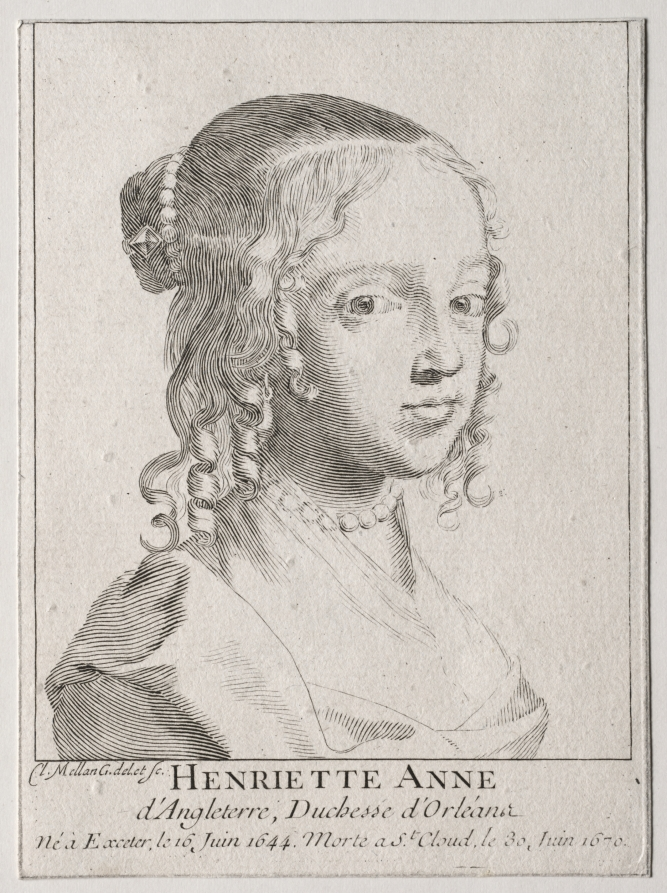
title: Henriette-Marie d'Angleterre, duchess d'Orleans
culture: France, 17th century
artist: Claude Mellan (French, 1598–1688)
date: 1655–61, published 1781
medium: engraving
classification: Print